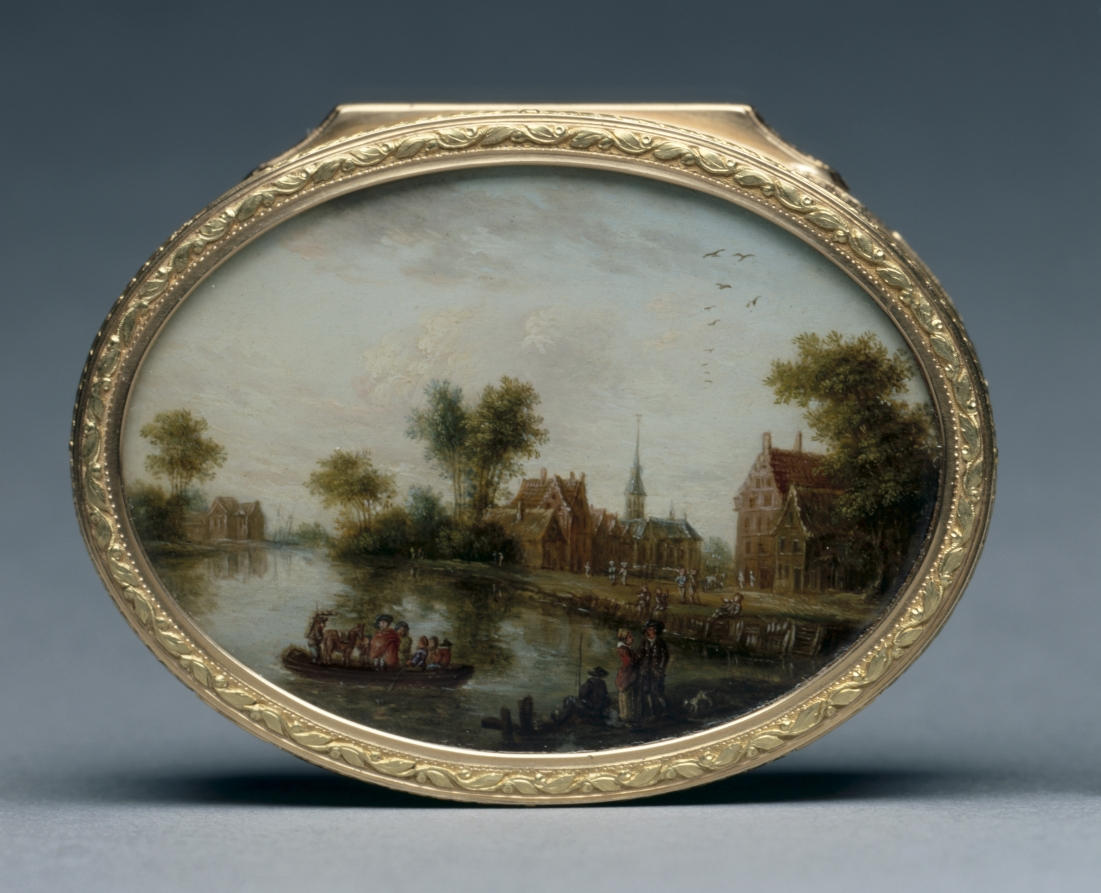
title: Snuff Box (Tabatière)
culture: France, 18th century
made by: Pierre-Nicholas Pleyard (French)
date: 1768–69; 1776–78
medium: gouache miniatures mounted on gold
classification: Metalwork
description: Snuff boxes were highly ornamented functional objects popular among French social elites. They were simultaneously containers for powdered tobacco and a means to communicate social and political status. Often decorated with miniature paintings inspired by popular paintings of the time, the works reproduced on this box are modeled after those of Claude-Joseph Vernet (cover and front panel) and David Teniers the Younger (base, side, and back panels).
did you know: These miniature paintings are mounted à cage, a practice popular in the mid-1700s that involved setting decorated panels into gold frames to create a box’s walls.